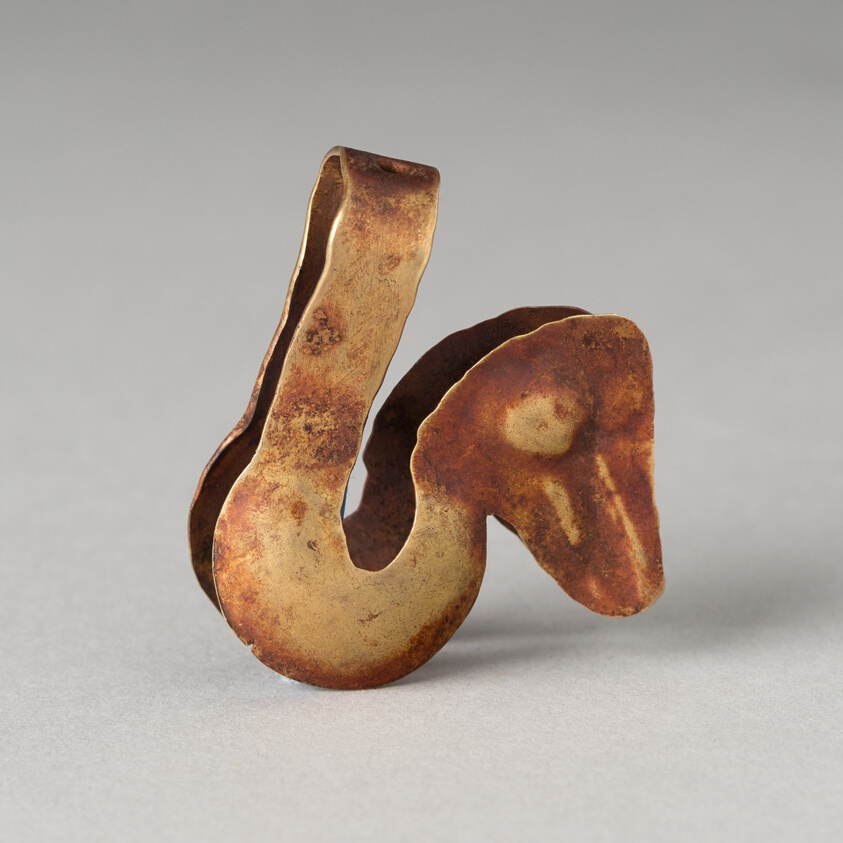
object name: Decorative Arts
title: Tweezers in the Shape of a Bird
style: chimú, Pre-Columbian, americas, Arts of the Americas, andean, andes, peruvian, south american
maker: Probably Chimú; North coast, Peru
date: Probably 1000–1400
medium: Gold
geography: Peru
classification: metal; american decorative arts; utensil; decorative arts; art of the americas